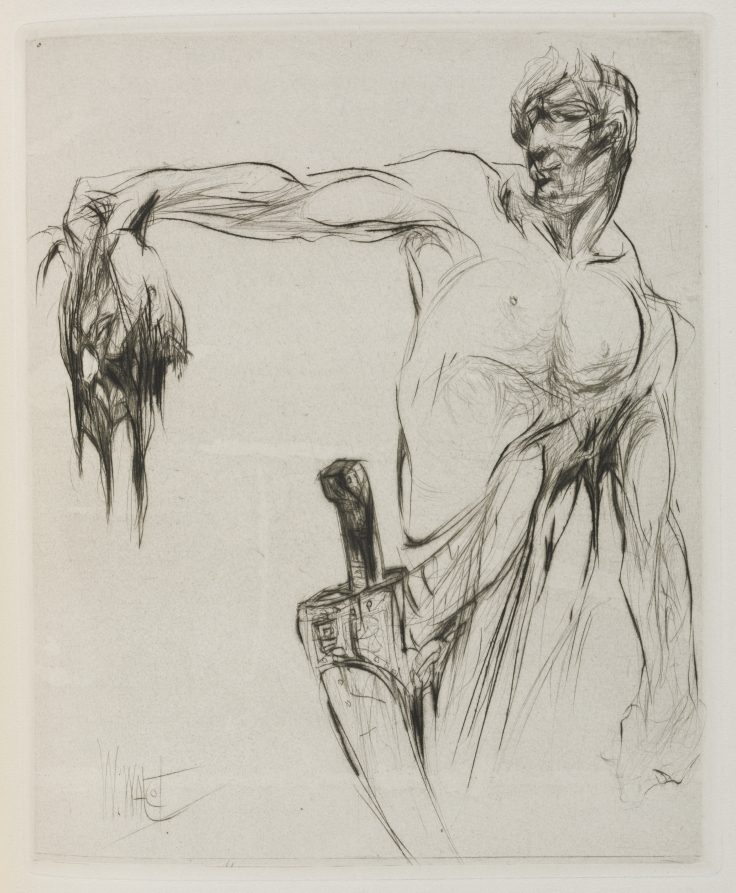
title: Herodias: Page 53, The head entered and mannaeus held it by the hair, at arm's length, proud from the applause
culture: England, 20th century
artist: William Walcot (British, 1874–1943)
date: 1928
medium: etching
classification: Print